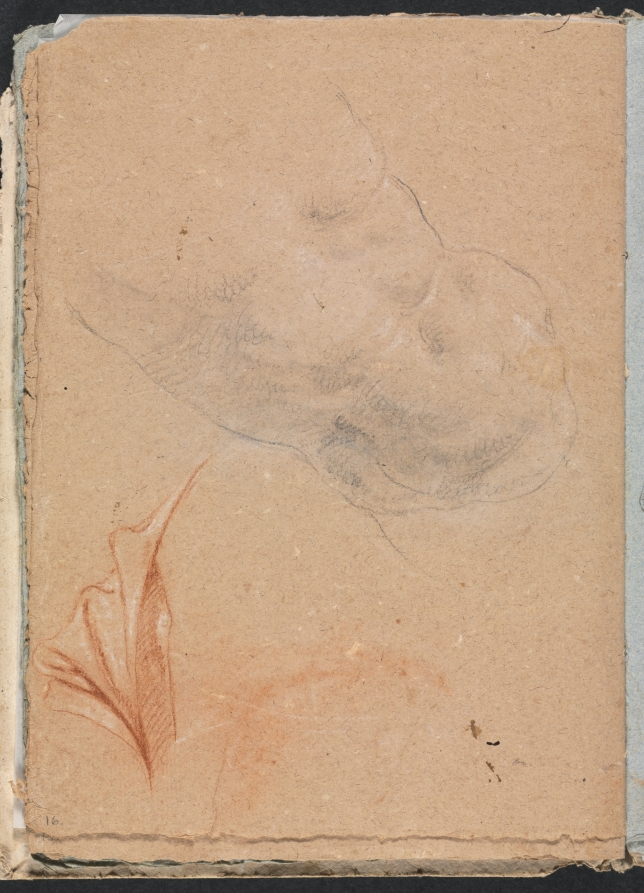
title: Verona Sketchbook: Nude male torso with drapery (page 16)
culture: Italy, 18th century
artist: Francesco Lorenzi (Italian, 1723–1787)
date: 1760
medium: black and red chalk with white heightening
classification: Bound Volume